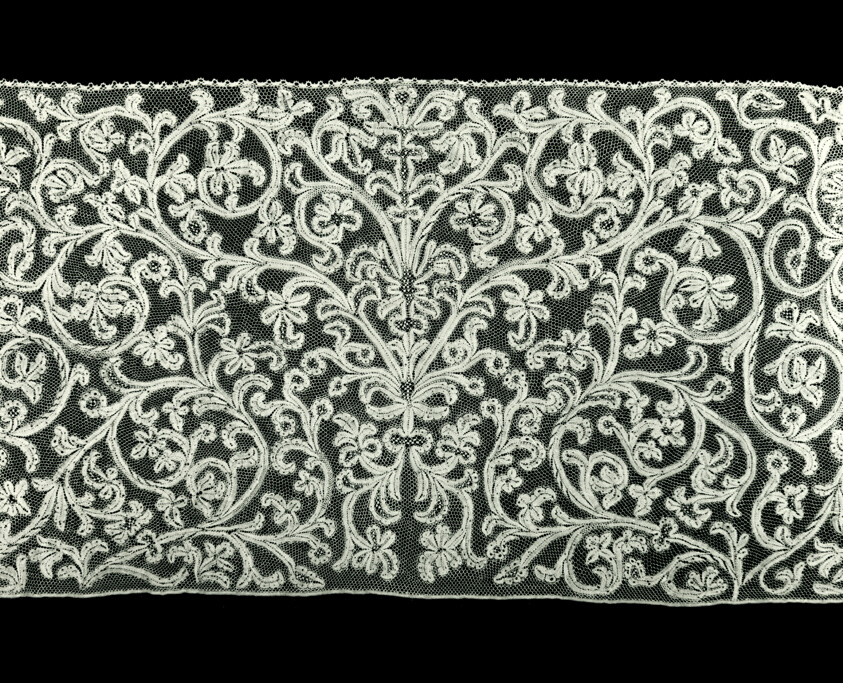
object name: Textile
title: Flounce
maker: Italy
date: 1701/50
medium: Linen, bobbin part lace (made in large sections)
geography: Italy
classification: textile; lace - bobbin